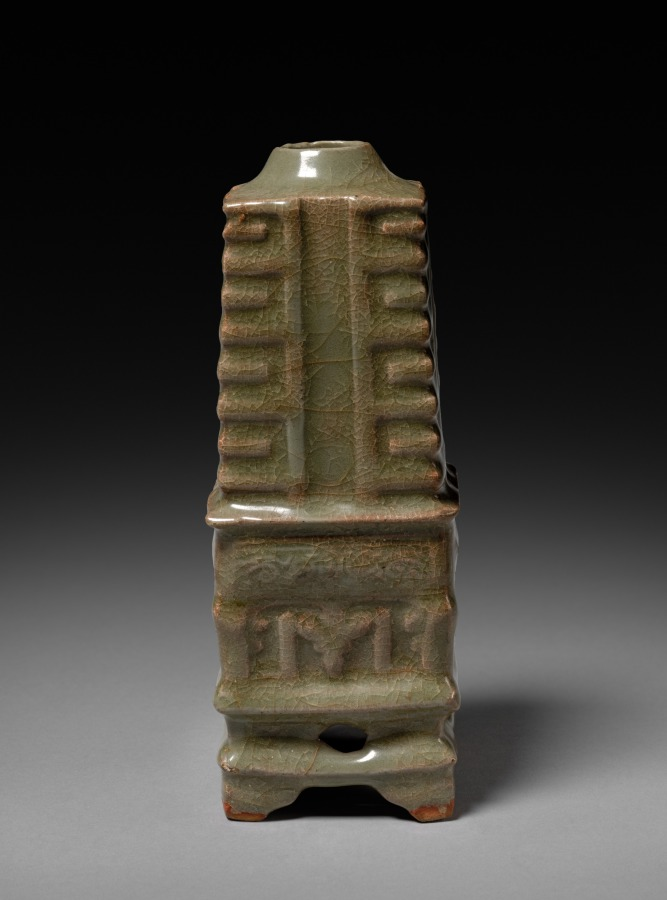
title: Vase in Shape of Cong: Southern Celadon Ware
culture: China, Zhejiang province, Yuan dynasty (1271-1368)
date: 1271–1368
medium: glazed buff stoneware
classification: Ceramic